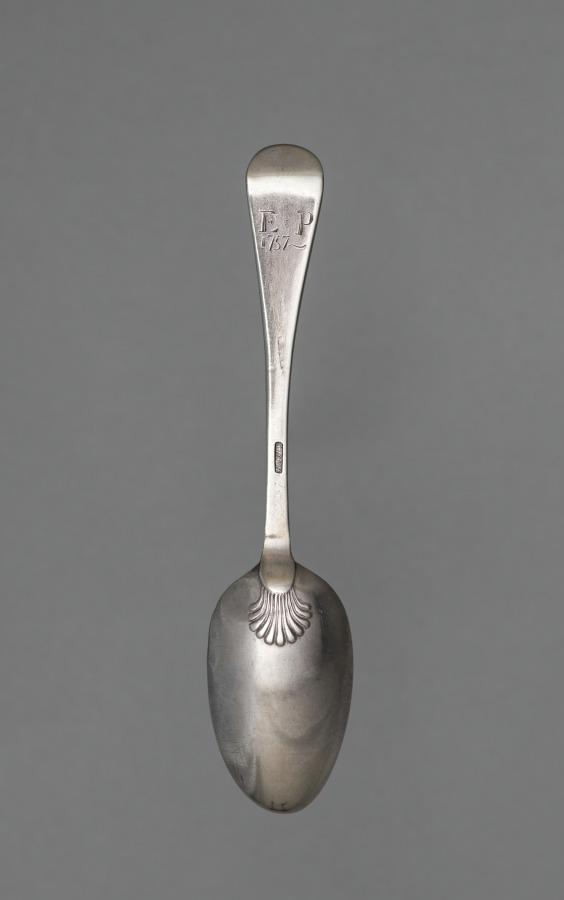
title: Tablespoon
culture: America, Massachusetts, Boston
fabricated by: William Homes (American, 1717–1783)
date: 1757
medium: silver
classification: Silver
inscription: engraved: E=P in shaded block letters over 1757 on back of handle end.